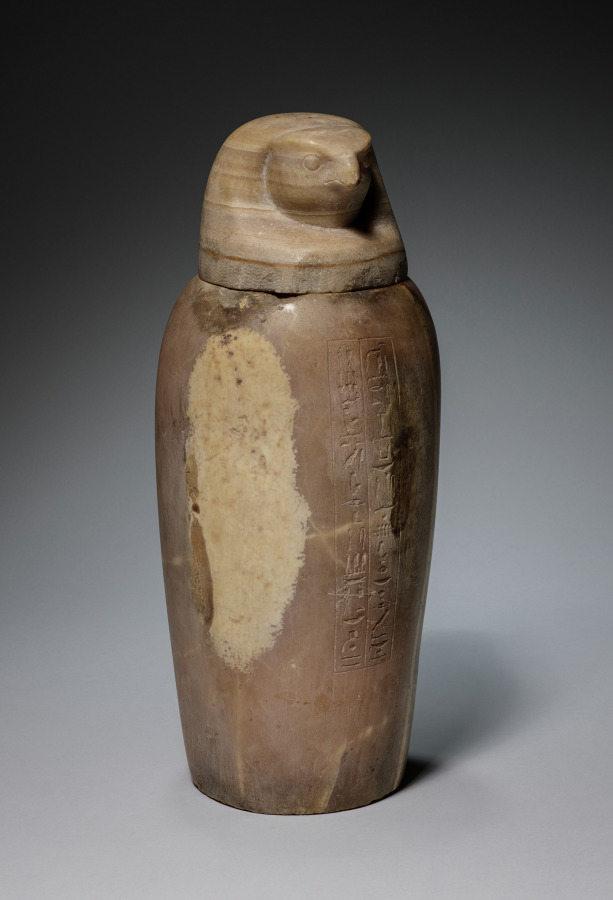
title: Canopic Jar with Falcon's Head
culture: Egypt, Late period (715–332 BCE), Dynasty 26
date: 664–525 BCE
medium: travertine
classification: Funerary Equipment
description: In the process of mummification, the liver, lungs, stomach, and intestines were removed, separately embalmed, and stored in specialized jars known as canopic jars (after a sailor in Greek mythology, who died at the town of Canopus in the Nile Delta and was worshipped there in the form of a human-headed jar). Each organ was identified with one of four funerary deities collectively known as the Sons of Horus: the liver with Imsety (man's head), the lungs with Hapy (baboon's head), the stomach with Duamutef (jackal's head), and the intestines with Qebehsenuef (falcon's head). It was their duty to protect the deceased and restore to him his body parts in the hereafter.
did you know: The falcon-headed deity Qebehsenuef protected the contents of this canopic jar. It contained the remains of the deceased's intestines, which were kept safe for the afterlife.